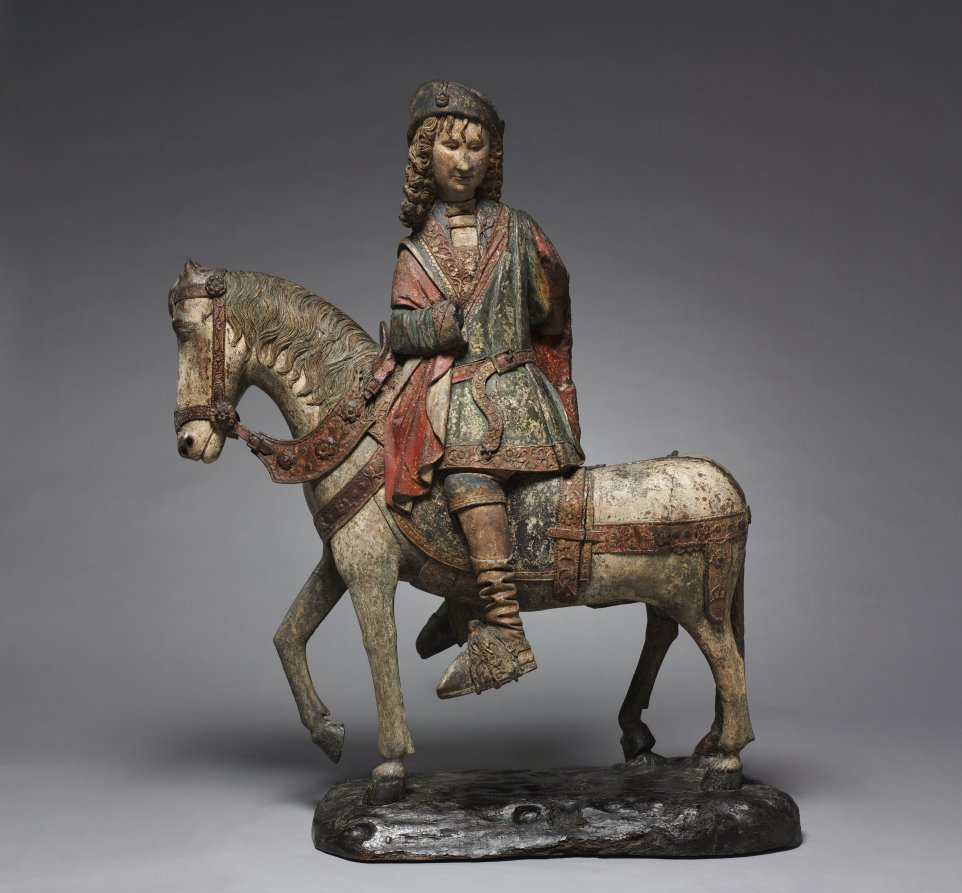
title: Saint Martin of Tours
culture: Northeast France or Flanders, 15th century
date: c. 1480–1500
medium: polychromed walnut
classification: Sculpture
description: According to tradition, Saint Martin was born during the reign of Constantine the Great (306–37 CE) and served as a member of the Roman cavalry in Gaul. There he earned a reputation for humility and boundless charity. During the severe winter of 322 CE at Amiens, Martin's compassion for others led him to divide his cloak with his sword, and to give half to a poor, naked beggar. This event, along with Martin's subsequent vision of the beggar as Christ, eventually led to the saint's widespread popularity throughout medieval Europe. Saint Martin was particularly venerated in the city of Tours where he served as bishop, where his tomb is located, and of which he remains the patron saint.